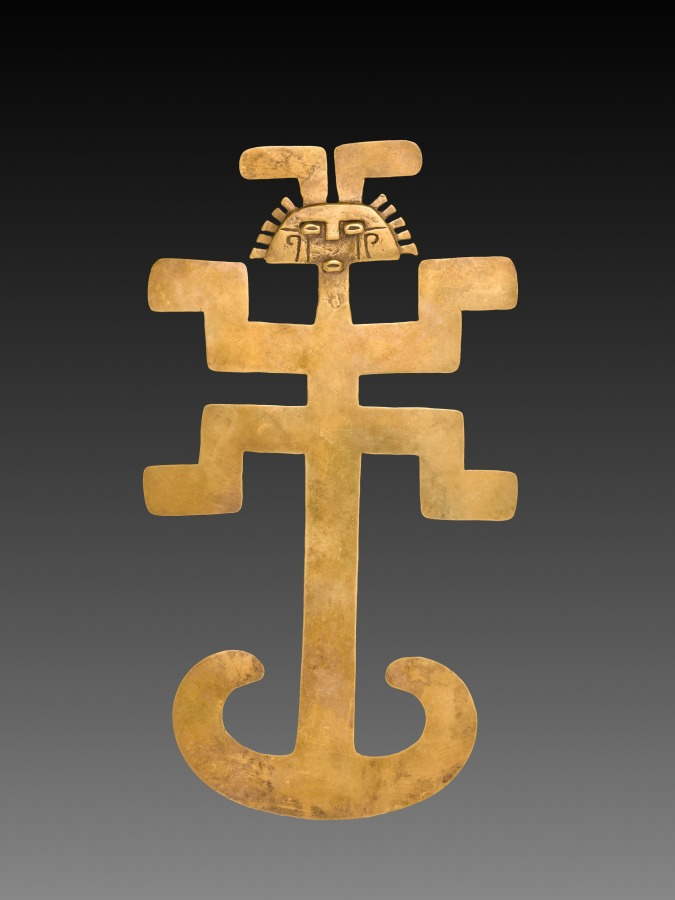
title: Figural Pendant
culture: Isthmian Region (Colombia), Tolima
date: 1–800 CE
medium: gold, cast and hammered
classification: Metalwork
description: Colombia's Tolima region is justly famous for arrestingly abstracted figures like this one, among the largest of its kind. Such figures, worn as necklace pendants by chiefs and other elites, seem to be based on the human form. But they also incorporate animal features, often an upturned, bifurcated tail sometimes compared to that of a serpent and large, angled head appendages that may refer to animal ears or even insect antennae.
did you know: Pendants in the form of figures with X-shaped bodies are an iconic Tolima type.